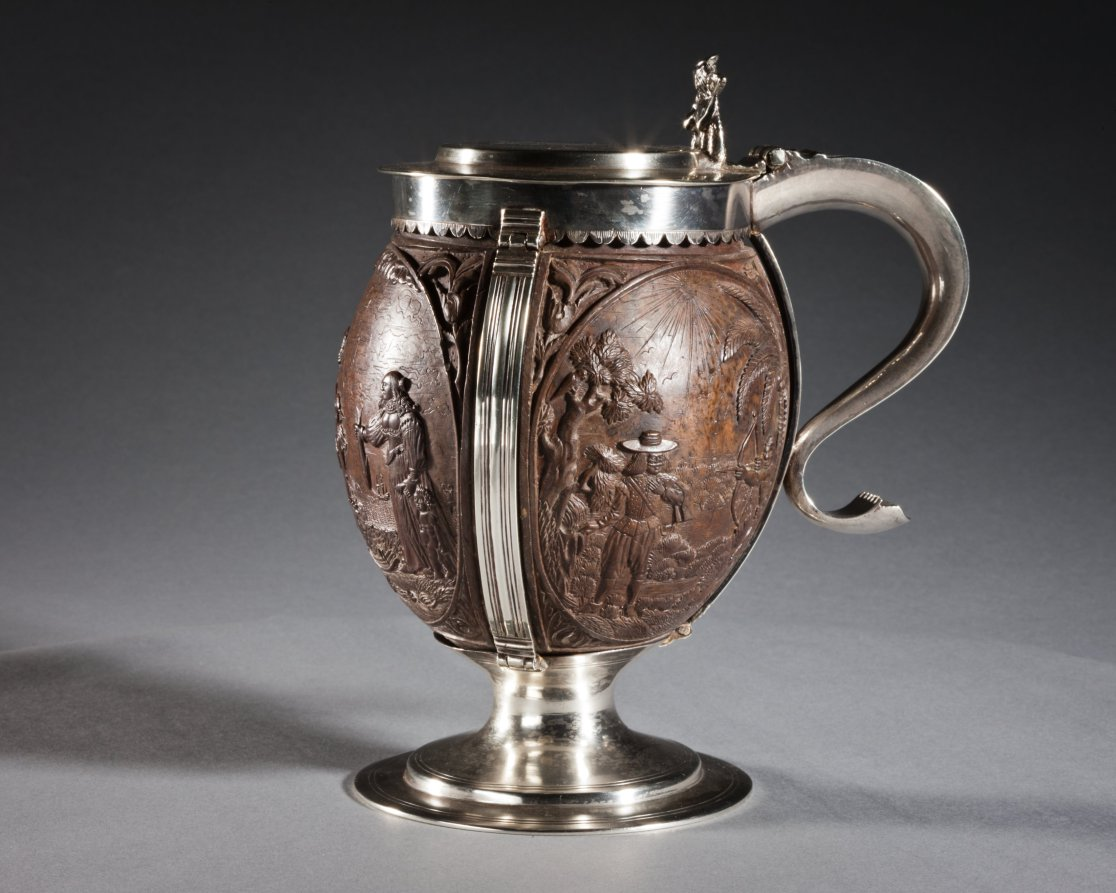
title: Coconut Cup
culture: carved coconut, probably The Netherlands; silver mount, probably England, 17th century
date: c. 1630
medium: carved coconut in silver mount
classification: Metalwork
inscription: top lid has engraved coat-of-arms, underside of lid has inscription: George Lewis TIVERTON Feby, 1st 1760.